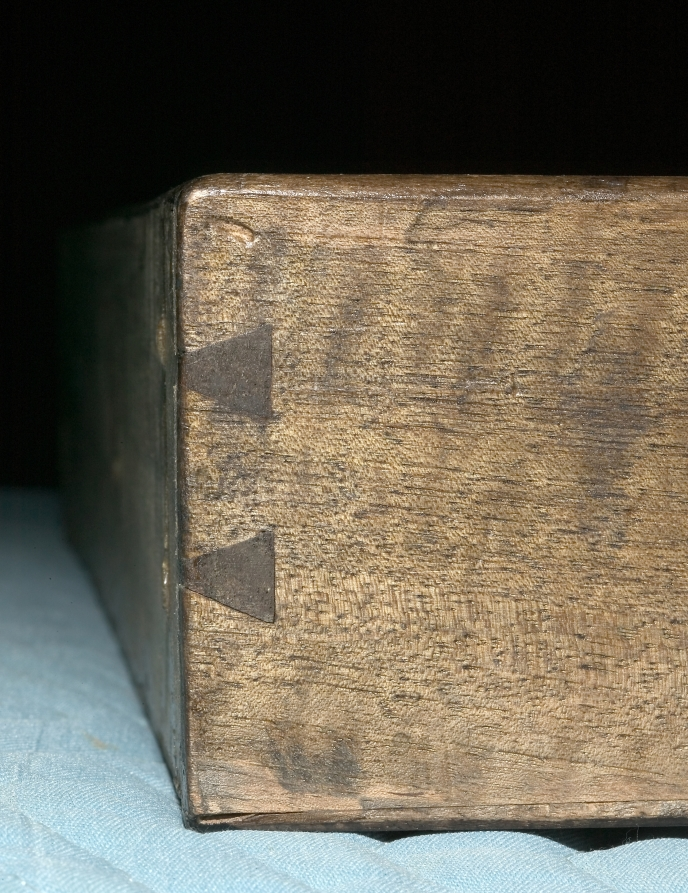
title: Table Desk (Bureau Plat)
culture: France, 18th century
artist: Bernard II van Riesen Burgh (Dutch, 1766)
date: c. 1750– 1760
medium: wood marquetry with gilt bronze mounts, leather top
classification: Furniture and woodwork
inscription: signed three times on bottom edge of apron: B. V. R. B.